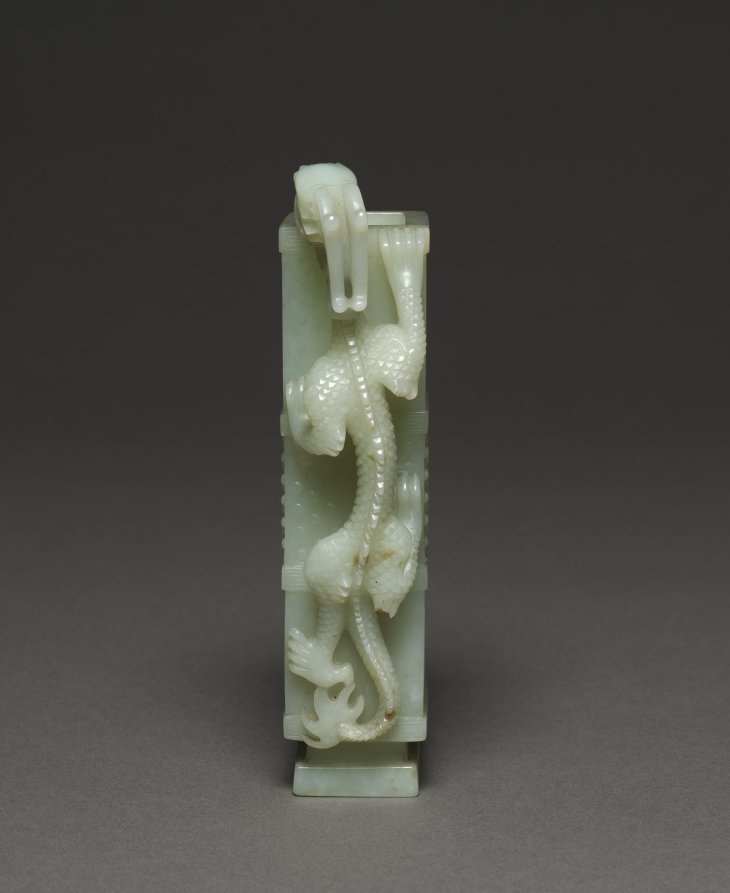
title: Rectangular Wine Cup (Zun) with Dragon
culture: China, Qing dynasty (1644–1911)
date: 1700s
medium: grayish-white jade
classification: Jade